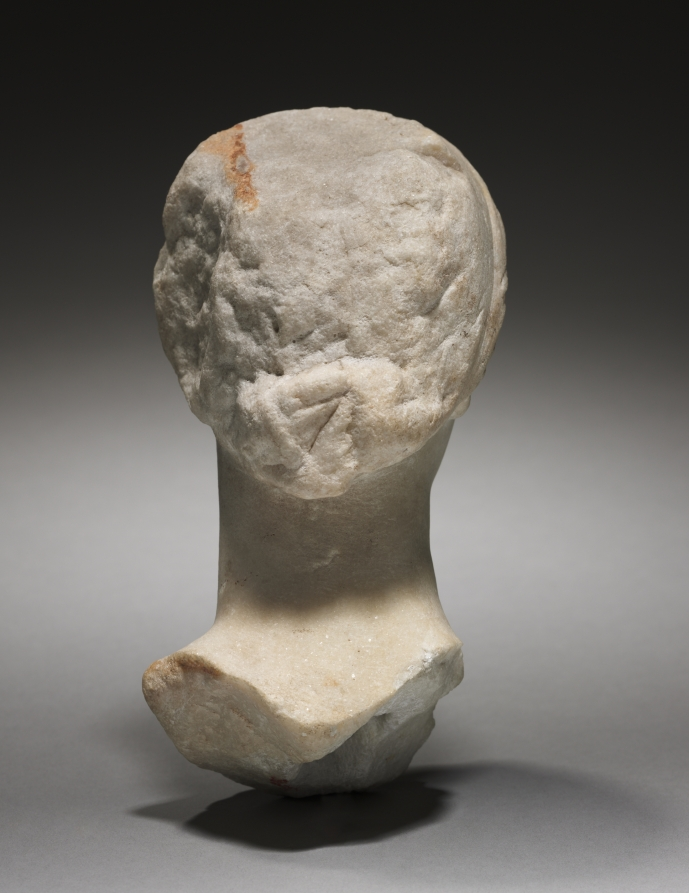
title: Head of a Woman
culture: Greece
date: 400–200 BCE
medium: marble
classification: Sculpture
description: This marble bust of a woman is rendered with the soft, delicate features typical of Greek sculpture of the late fourth and early third century BCE. Her features nearly disappear into the smooth landscape of her face, each curve fading softly into the next. Her hair is held away from her forehead in a series of tight braids pulled back to a bun, now mostly lost.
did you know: Though this hairstyle is often associated with sculptures of Aphrodite, it was also a popular style among mortal Greek women.